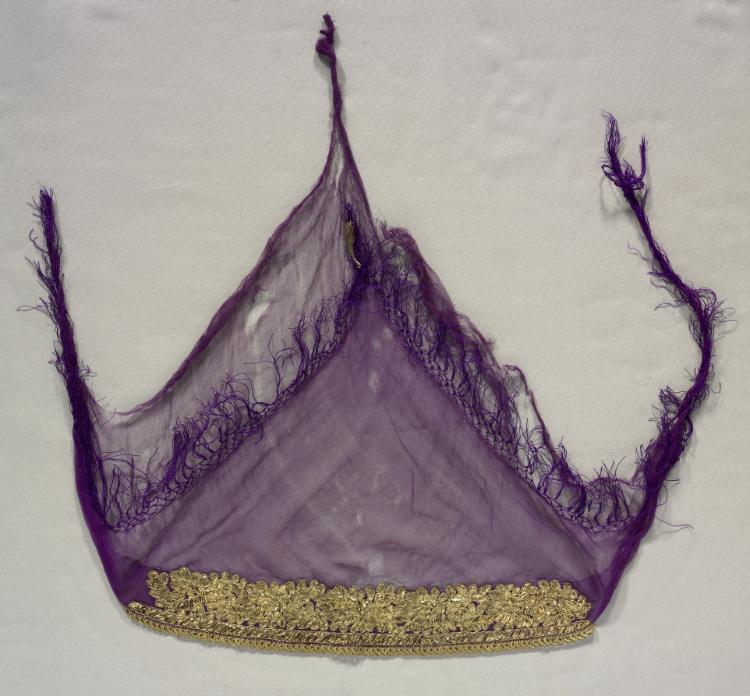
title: Cap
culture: Dalmatia, 19th century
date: 19th century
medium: Plain weave silk with metal thread embroidery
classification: Embroidery